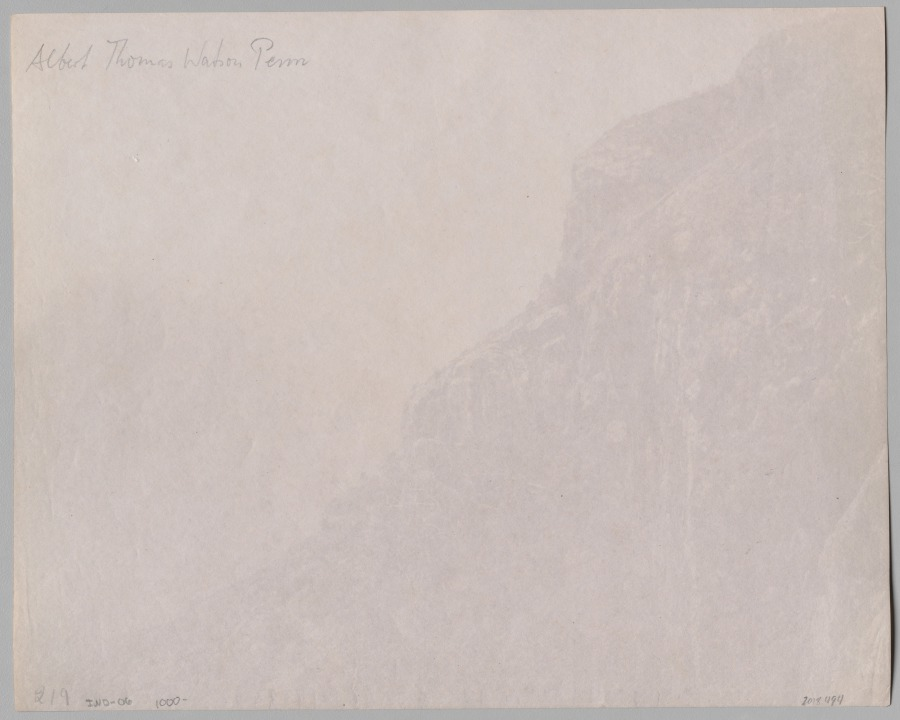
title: Cliffside, India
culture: Britain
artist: Albert Thomas Watson Penn (British, 1849–1924)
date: c. 1880s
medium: albumen print from collodion negative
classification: Photograph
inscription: Written in pencil on verso: "Albert Thomas Watson Penn"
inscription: Written in pencil on verso: "219"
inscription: Written in pencil on verso: "IWD-06 1000-"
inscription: Imprinted in photo in lower left on recto: "Penn/219"